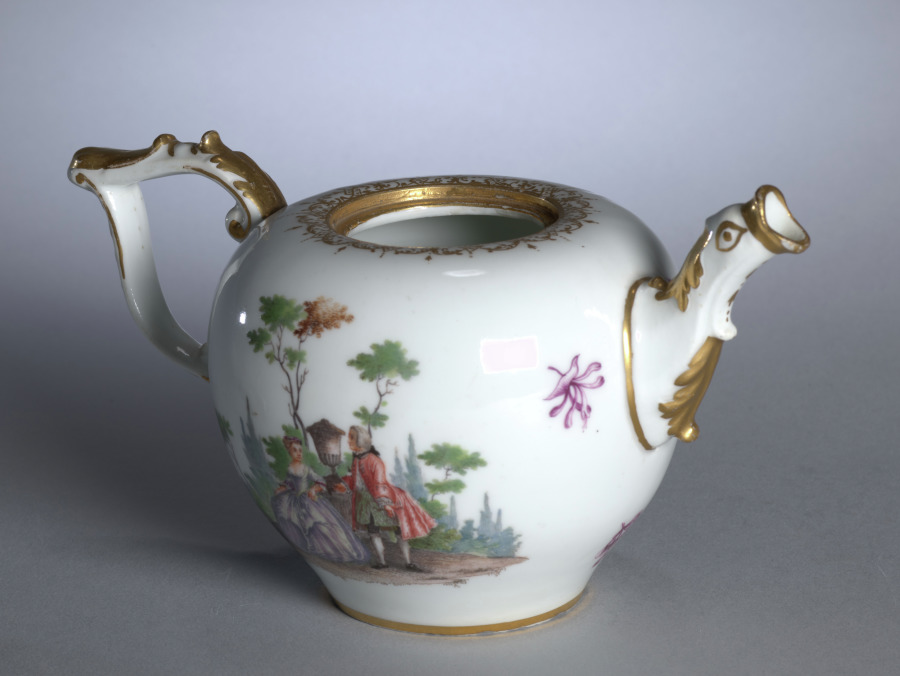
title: Teapot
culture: Germany, Meissen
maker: Meissen Porcelain Factory (German, est. c. 1710)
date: c. 1750–70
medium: porcelain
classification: Ceramic